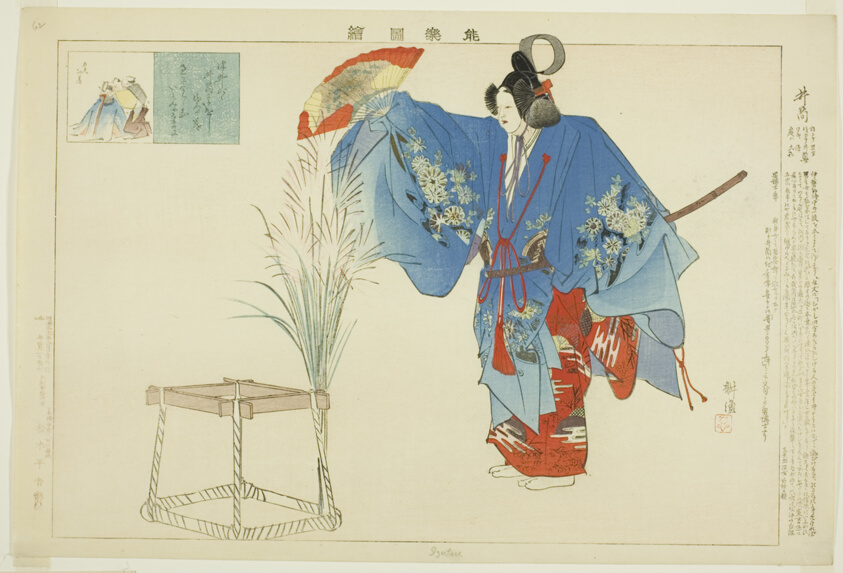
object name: Print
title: Izutsu, from the series "Pictures of No Performances (Nogaku Zue)"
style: Japanese (culture or style)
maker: Tsukioka Kogyo; Japanese, 1869-1927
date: 1898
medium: Color woodblock print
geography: Japan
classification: woodblock print; print; asian art